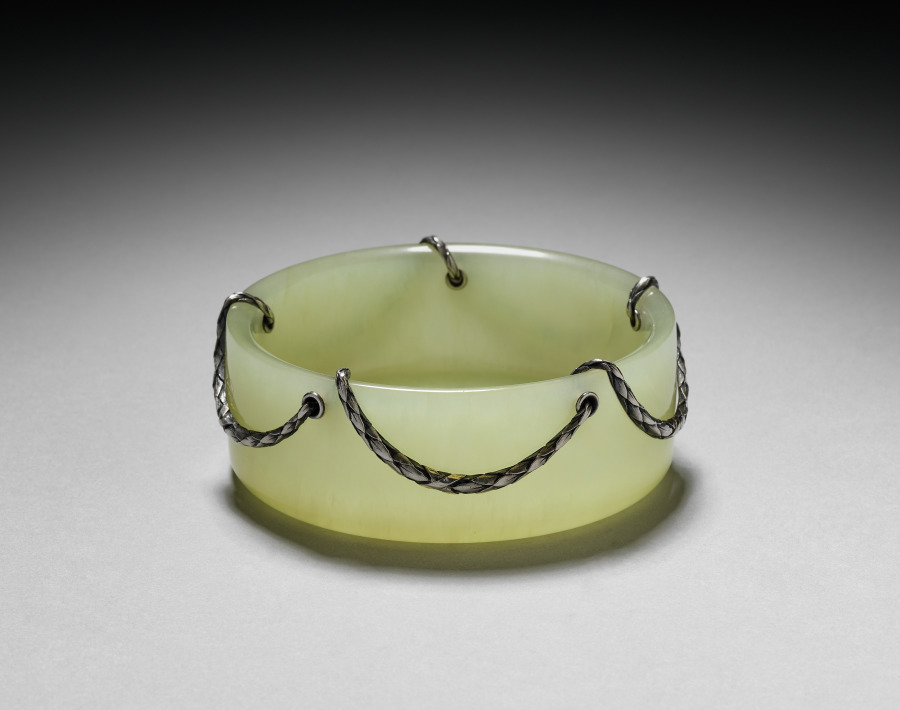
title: Dish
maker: House of Fabergé (Russian, 1842–1918)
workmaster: Hjalmar Armfelt (Finnish, 1873–1959)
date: c. 1904–16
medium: bowenite, silver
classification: Silver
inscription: Impressed mark: 88, silver standard; initials for workmaster Karl Gustav Hjalmar Armfelt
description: The House of Fabergé specialized in the creation of little treasures intended as opulent personal gifts. In creating luxurious accessories for a desk or tabletop, Fabergé often used native hardstones such as multicolored agate and quartz, green nephrite, pink rhodonite, rock crystal, and pale green bowenite found in the Ural Mountains of western Russia. Fabergé's designers often paired hardstones with silver mounts, particularly in the Moscow workshop where the company's silversmiths were concentrated.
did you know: Sometimes called "new jade," bowenite is actually considered a semiprecious gemstone. Though Fabergé obtained his supply from the Ural Mountains of Russia, bowenite is also the state mineral of Rhode Island.